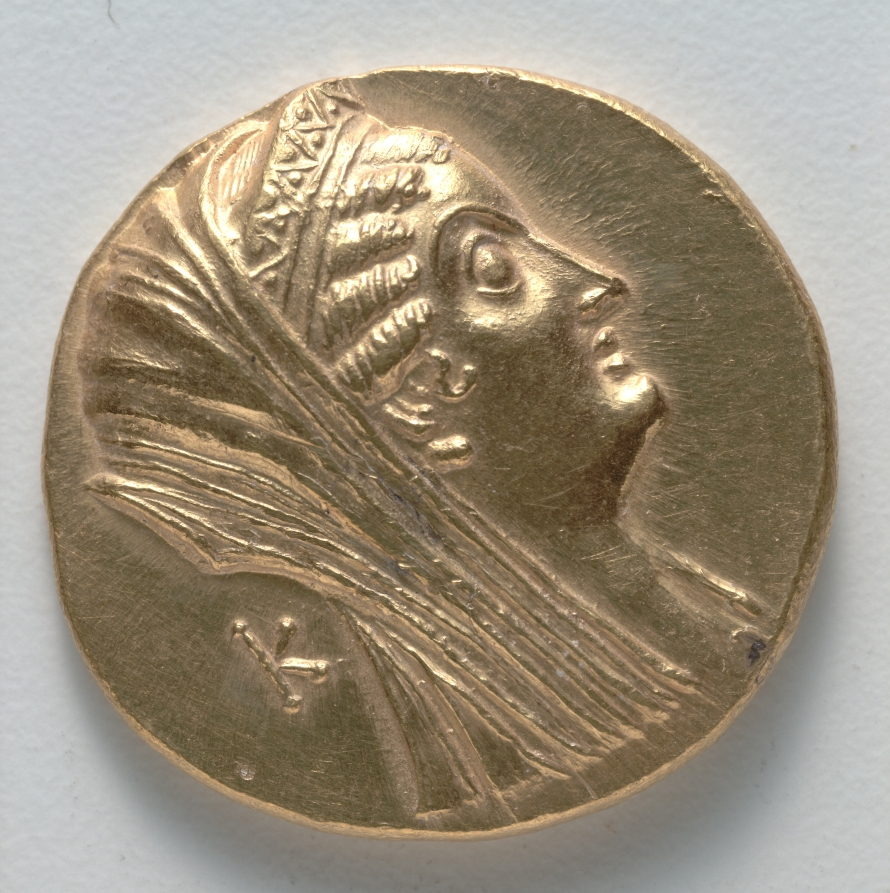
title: Octodrachm: Head of Arsinoe II, r. (obverse)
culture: Greek, Ptolemaic, minted at Alexandreia (Egypt), reign of Ptolemy V Epiphanes or Ptolemy VI Philometor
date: 205–145 BCE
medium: gold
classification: Coins